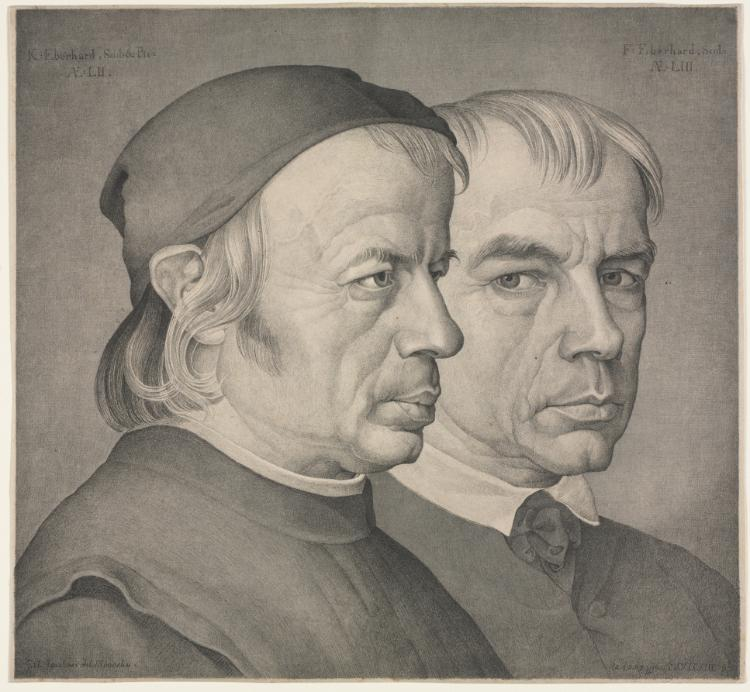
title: The Brothers Eberhard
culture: Germany, 19th century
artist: Johann Anton Ramboux (German, 1790–1866)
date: 1822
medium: lithograph printed in black and gray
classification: Print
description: Johann Anton Ramboux belonged to a group of artists called the Nazarenes, who lived a pious lifestyle and emulated the draftsmanship of early masters such as Albrecht Dürer. This print demonstrates their interest in drawing through Ramboux’s careful modeling of two profiles in light and shade. The sitters were brothers and artists who worked in the same circle as Ramboux. He made the lithograph for the Eberhards as a Freundschaftsbild (friendship portrait)—a type of image given between 19th-century artists to commemorate a relationship.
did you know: This lithograph was printed in only a few impressions, as a gift for the sitters.